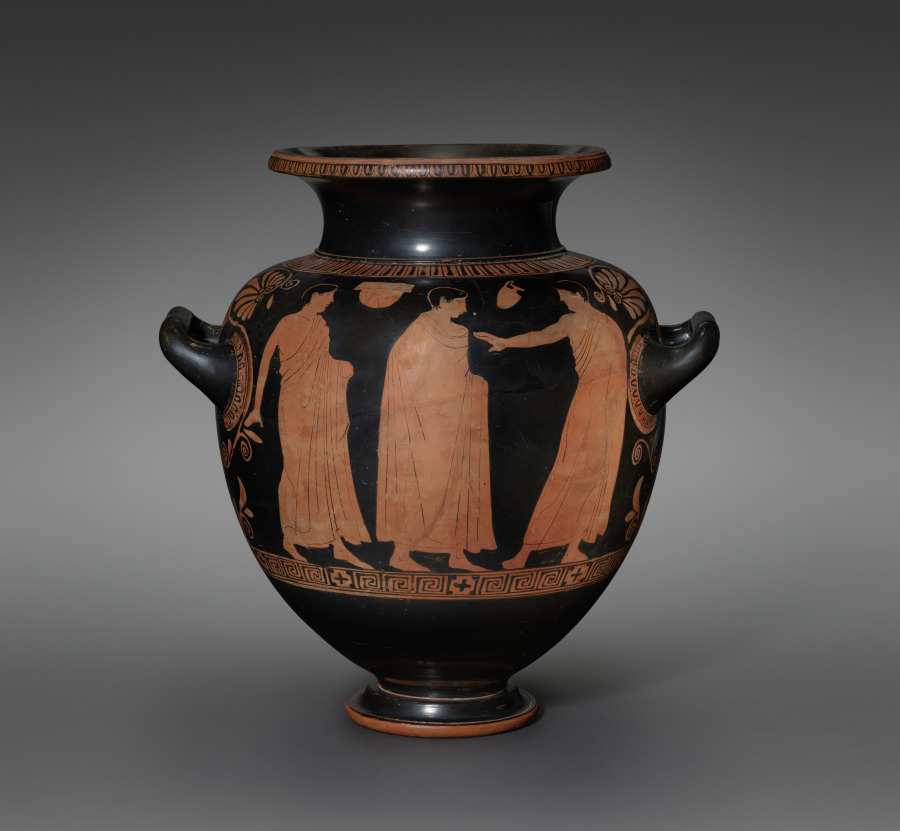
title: Red-Figure Stamnos (Mixing/Storage Vessel): Komos (Musicians and Revelers)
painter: attributed to Kleophon Painter (Greek, Attic, active c. 440–410 BCE)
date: c. 435–425 BCE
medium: Ceramic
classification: Ceramic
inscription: Κ Α Λ Ο Σ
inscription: Κ Α Λ Ο [Σ]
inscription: black '080'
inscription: black 'WF2'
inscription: black '0.19'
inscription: red '09.6'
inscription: partially removed red and white sticker, with number blacked out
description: Four lively figures move to the right across the front side of this stamnos, a vase used for storing and mixing wine. First comes a finely dressed woman playing the pipes, followed by three male figures, all nearly nude. The bearded one holds a drinking cup and reaches back, perhaps dancing, while the last in line concentrates on the music of his lyre.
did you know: The Athenian stamnos, a shape favored by the Etruscans, was made primarily for export.